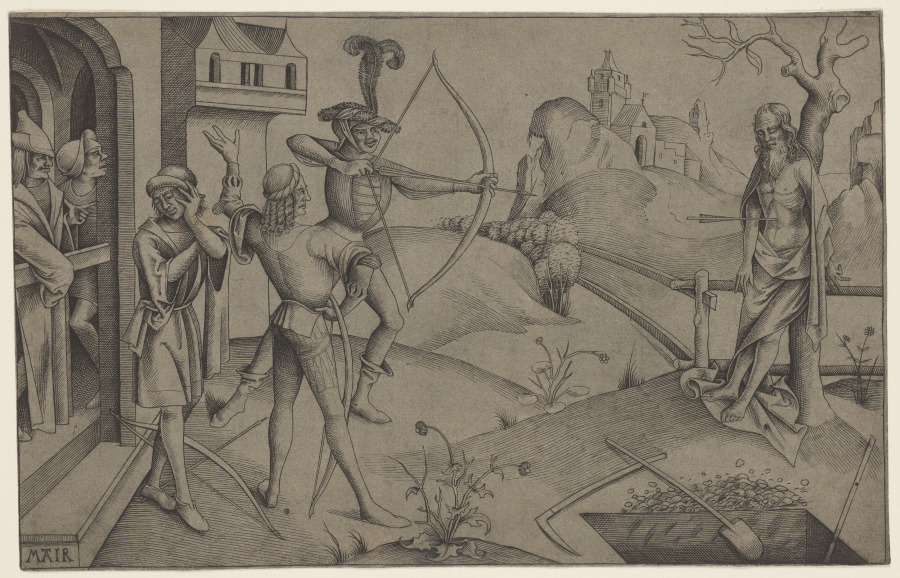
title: The King's Sons Shooting at their Dead Father's Body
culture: Germany, late 15th century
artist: Mair von Landshut (German, active about 1484–1520)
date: 1495–1504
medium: engraving on olive-gray tinted paper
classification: Print